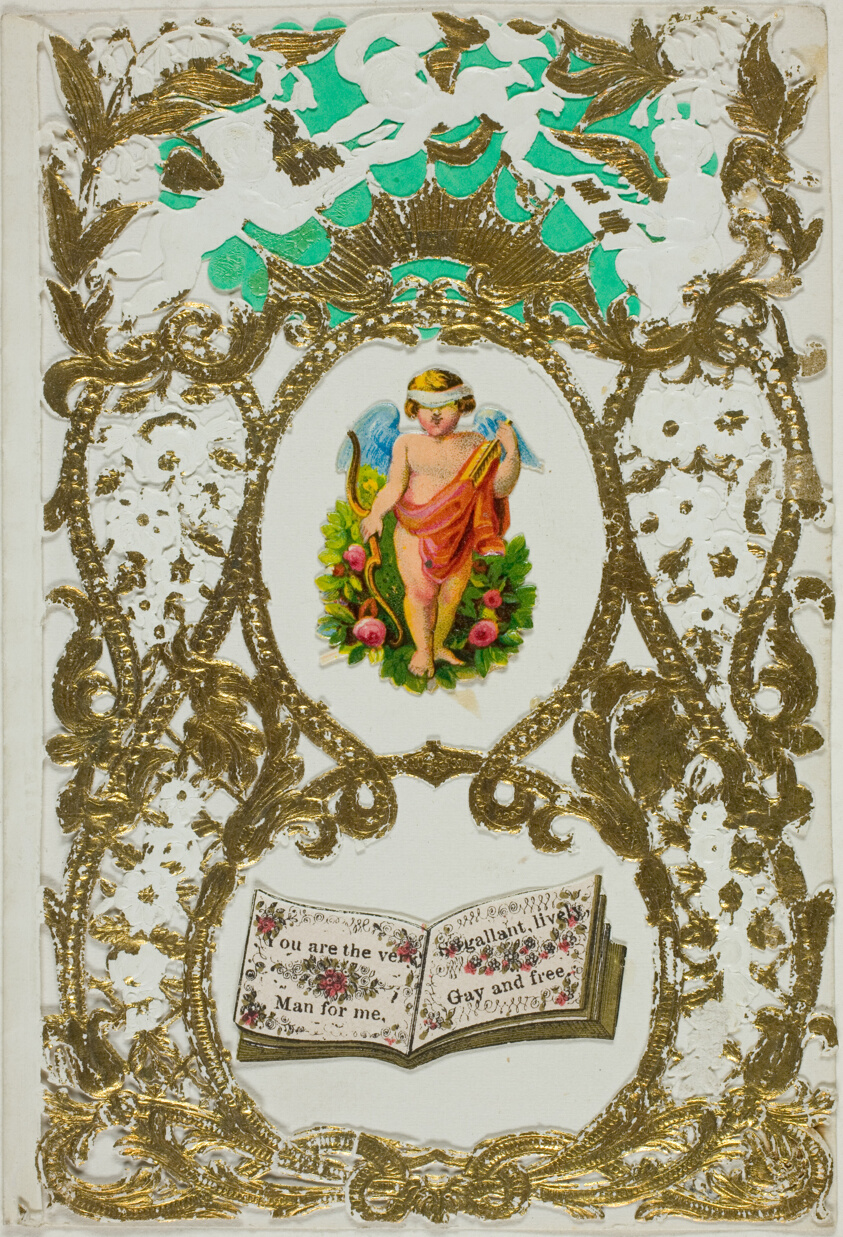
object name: Drawing and Watercolor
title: You Are the Very Man for Me (valentine)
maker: Unknown Artist; American or English, 19th century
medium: Collaged elements and gold paint on cut and embossed (designed) ivory wove paper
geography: United States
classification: valentine; prints and drawing; paper